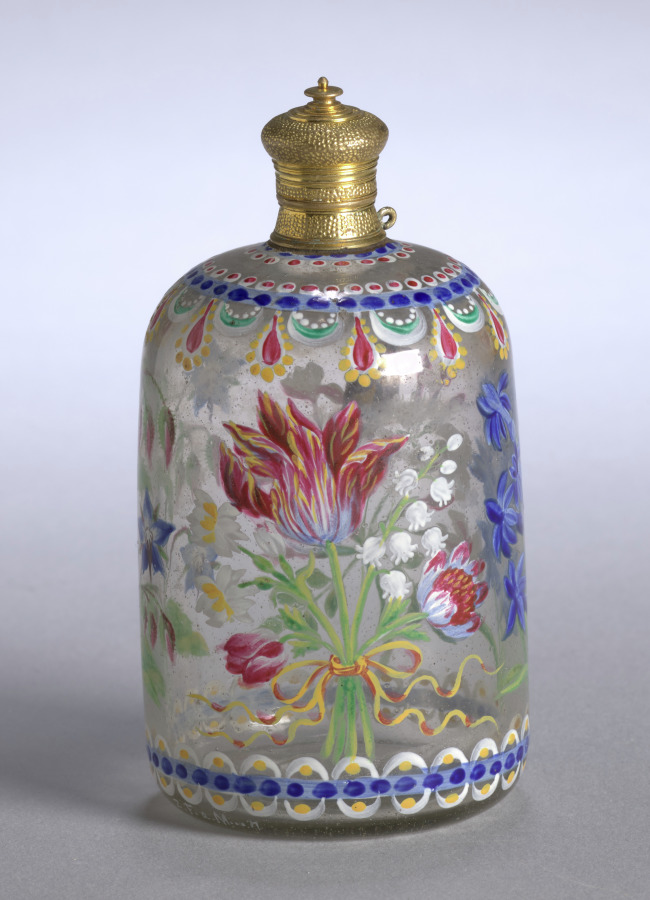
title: Scent Bottle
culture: Germany, 18th century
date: 1700s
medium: glass with enamel decoration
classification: Miscellaneous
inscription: signed: Z. F. a M.